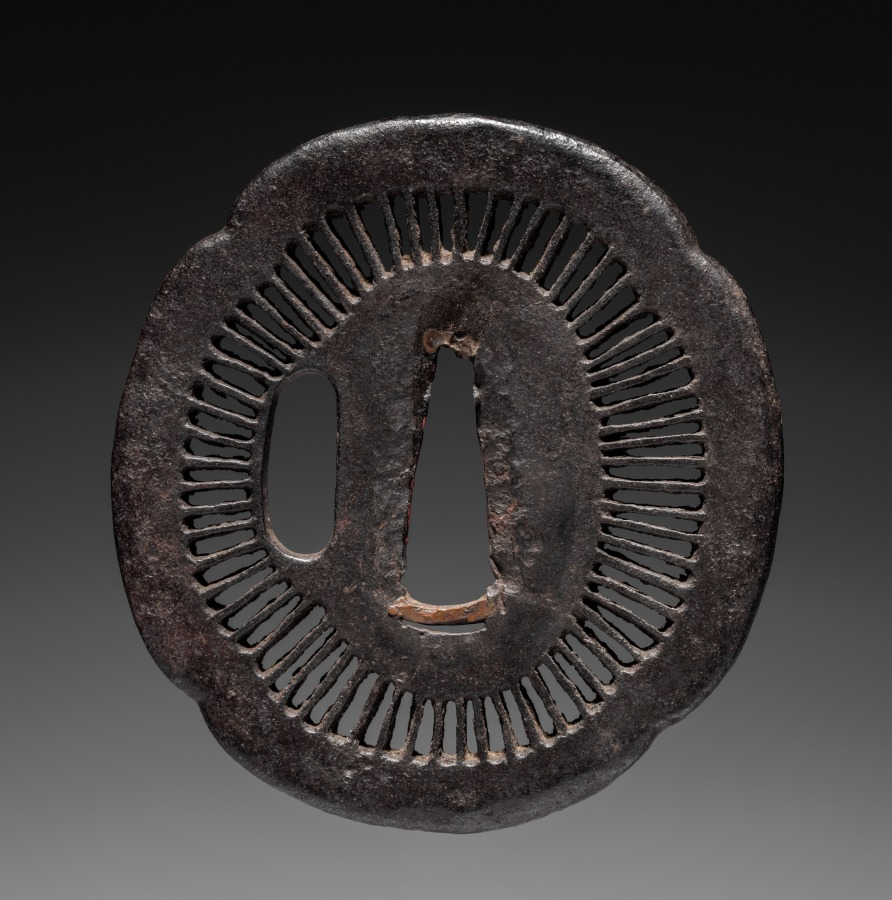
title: Sword Guard (Tsuba)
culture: Japan, possibly Edo period (1615-1868)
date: c. 1615–1868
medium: iron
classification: Arms and Armor